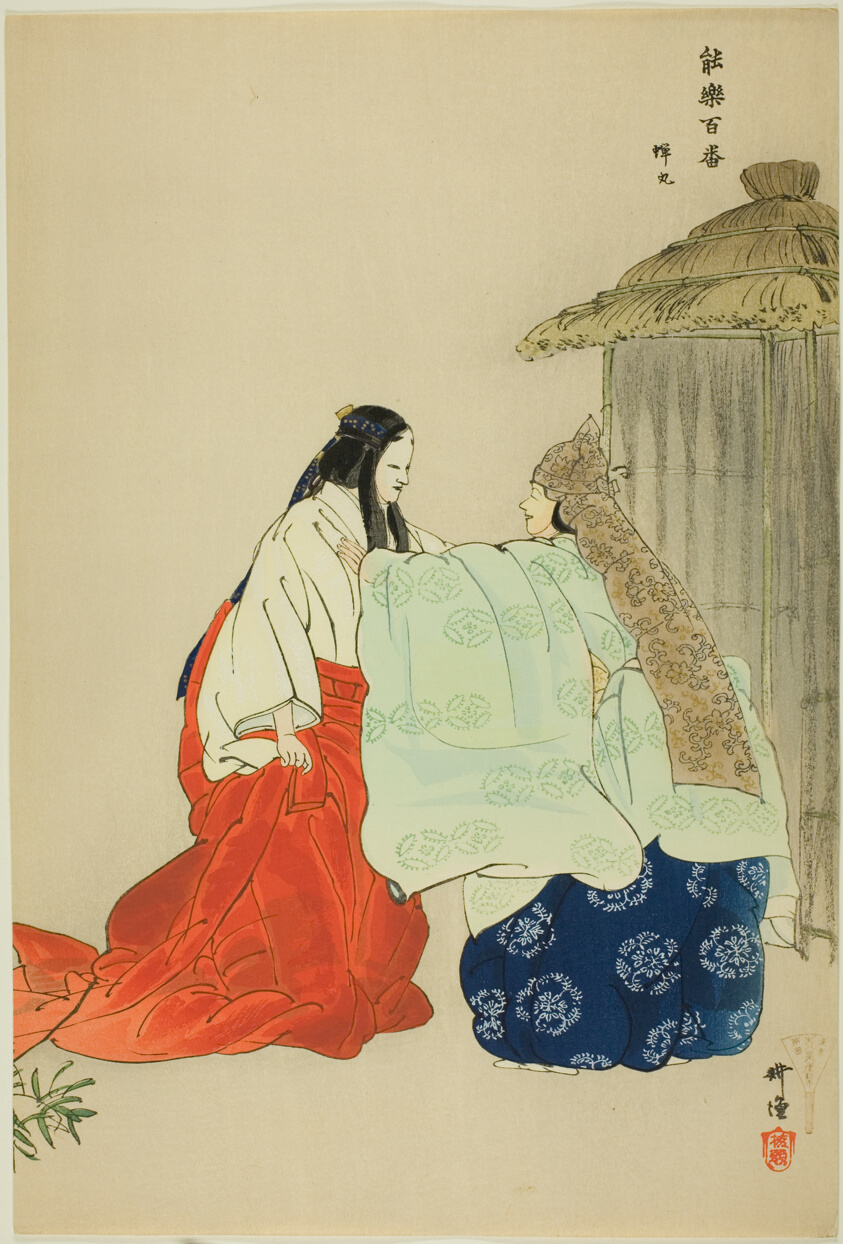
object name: Print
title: Semimaru, from the series "One Hundred No Dramas (Nogaku hyakuban)"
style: Japanese (culture or style)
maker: Tsukioka Kogyo; Japanese, 1869-1927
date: 1898/1903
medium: Color woodblock print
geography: Japan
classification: woodblock print; print; asian art